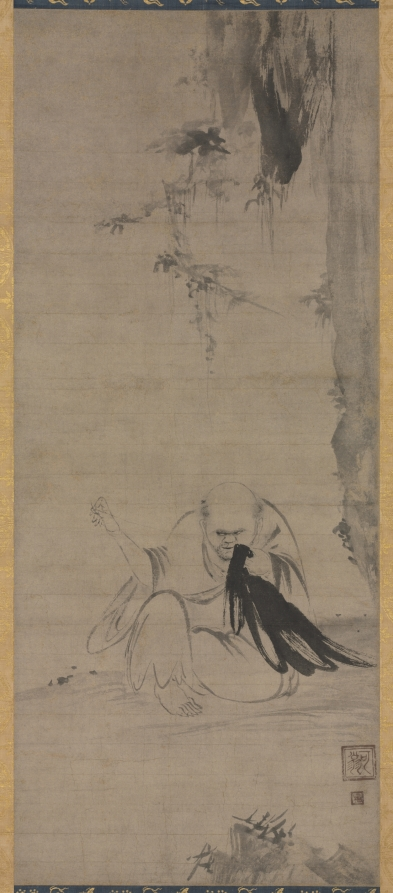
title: Monk Mending Clothes in the Morning Sun (Chōyō Hotetsuzu)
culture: Japan, Nanbokuchō period (1336–92)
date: c. 1350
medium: hanging scroll; ink on paper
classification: Painting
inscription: Seals: Kaō, Ninga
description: This painting illustrates the Zen ideal of cultivating one’s spirit through all moments of life, from the mundane to the marvelous. The monk pictured is simply mending his robes, but it is a meditative activity. A “mending clothes” image would typically form a pair with another on the theme of “reading by moonlight.” While the seals on the painting were added at a later date, similar seals appear on other ink figures and bird-and-flower compositions.